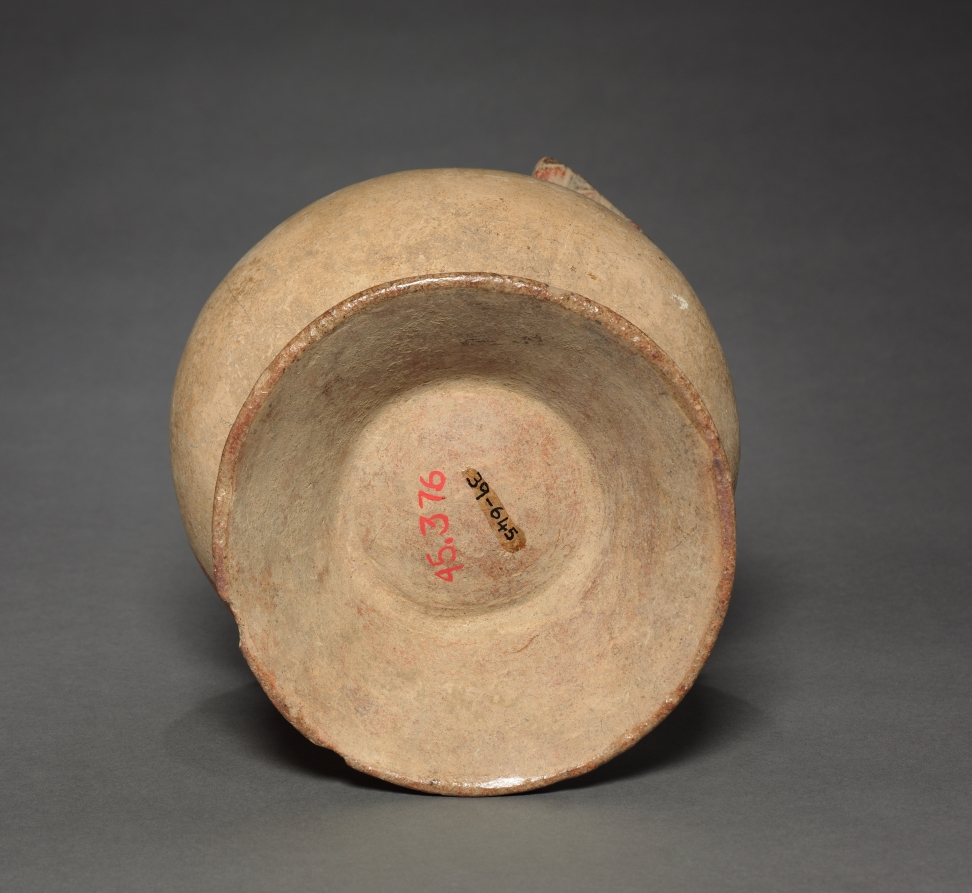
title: Turkey Vessel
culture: Costa Rica, Southern Nicoya region, Pataky Polychrome style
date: c. 1000–1550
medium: ceramic, slip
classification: Ceramic